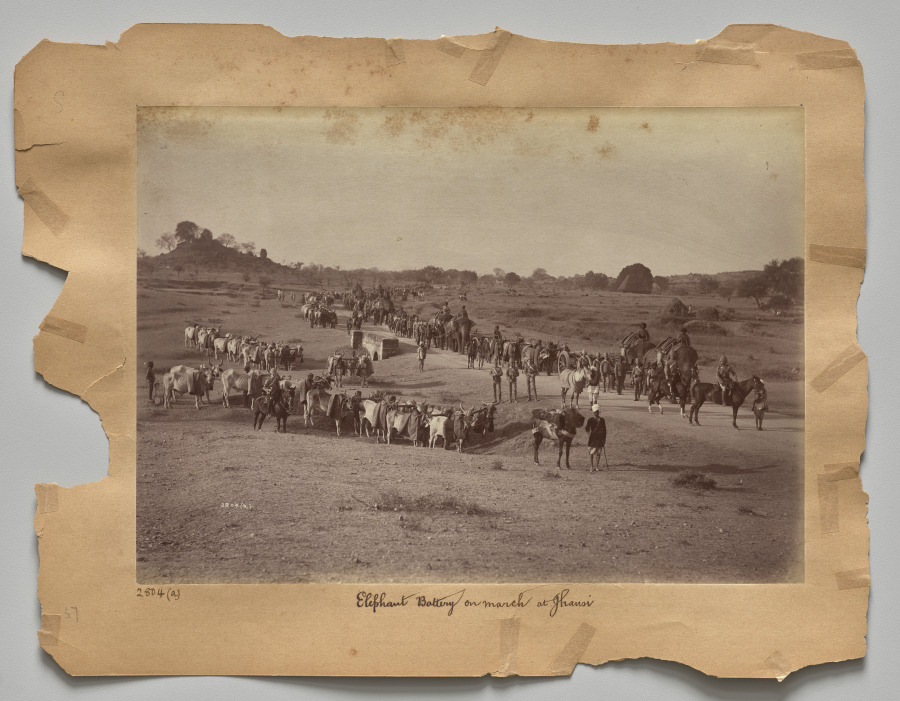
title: Elephant Battery on March at Jhansi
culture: India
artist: Raja Deen Dayal (Indian, 1844–1905)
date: c. 1882–87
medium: albumen print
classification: Photograph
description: These photographs are part of an album, now disassembled, of around 105 photographs taken in India between 1885 and summer 1887 that provide glimpses into the lives of the British colonial elite and royal and upper-class Indians. The museum holds another group of 37 pictures from this album (2016.266), which was probably commissioned by a British civil servant visiting or working in India around 1888 as a personal souvenir of his experiences there.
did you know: Raja Deen Dayal is regarded now, and was considered during his lifetime, to be India’s most important 19th-century photographer.